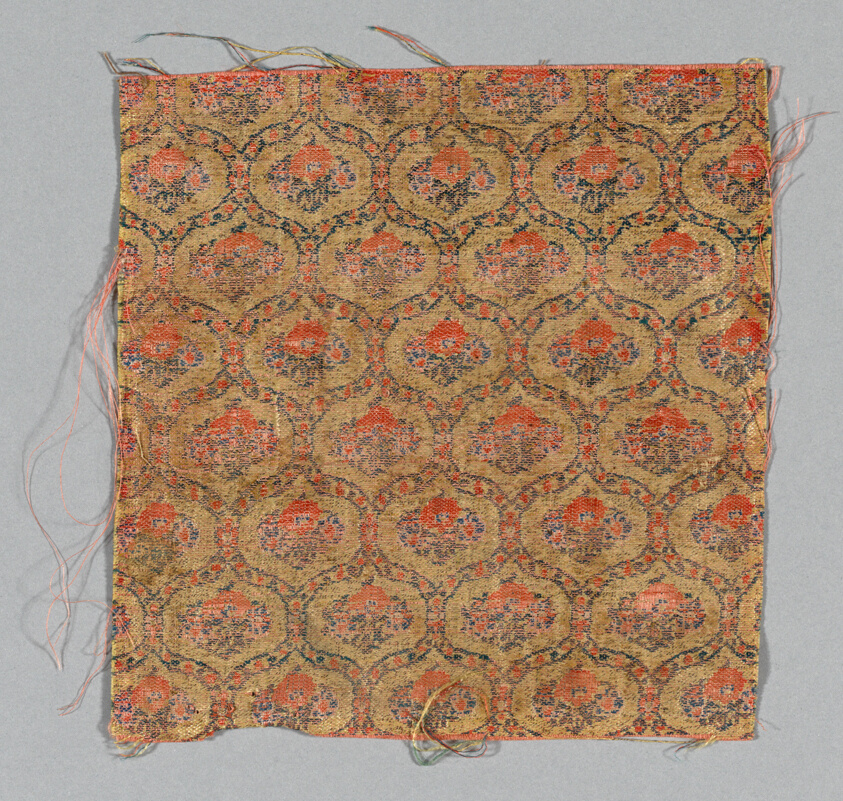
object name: Textile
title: Fragment (Dress Fabric)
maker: Near East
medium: Silk and gilt strip wound around a silk fiber core, plain weave with multiple ground wefts and inner or filler warps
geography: Middle East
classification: textile; weaving